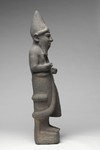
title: Priest-King or Deity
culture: Hittite, North Syria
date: c. 1600 BCE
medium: basalt with bone eyes (left, ancient; right, restored)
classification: Sculpture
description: The Hittites migrated into Anatolia in the 3rd millennium BCE and spoke an Indo-European language, a group that includes Greek, Latin, Persian, Sanskrit, English, and most modern European languages. They were the first ancient people to use iron for weapons. From about 1600–1200 BCE their empire was at its peak, extending from central Anatolia to Syria, and south along the eastern Mediterranean. Their vast empire and interest in commerce enabled the Hittites to spread Mesopotamian ideas and culture throughout the ancient Mediterranean world. This large basalt sculpture is exceptionally rare in depicting a Hittite god or priest-king wearing a horned conical crown, false beard, and long robe. He holds a bowl in his right hand and once held something in his left, perhaps a staff or sword.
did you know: The left eye of the sculpture is the original bone inlay while the right eye is a modern restoration done after the piece was damaged.